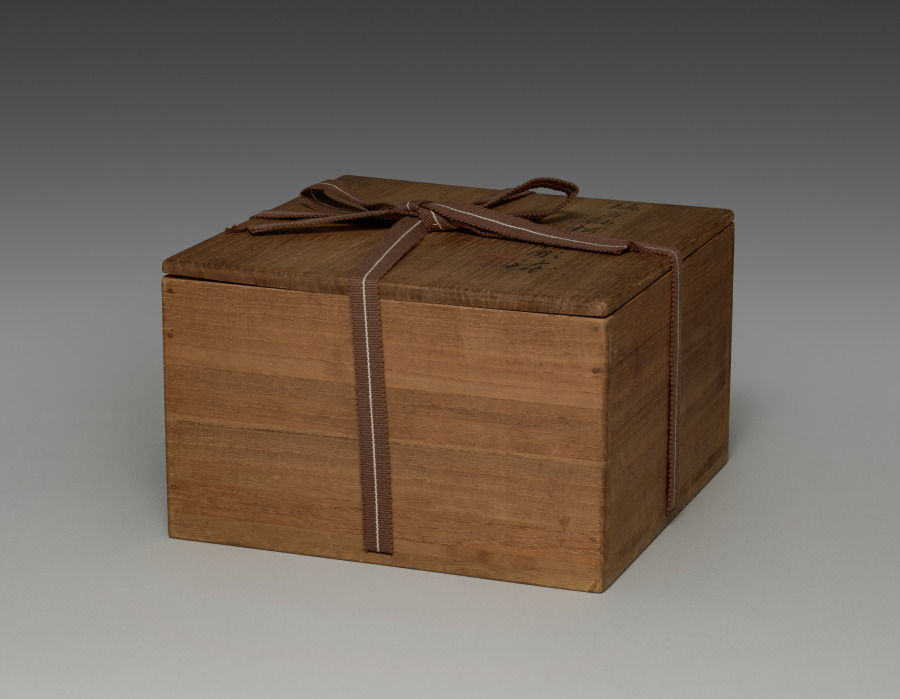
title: Bowl with Old Pine and Poem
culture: Japan, Taishō period (1912–26) or Shōwa period (1926–89)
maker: Seifū Yohei IV (Japanese, 1872–1951)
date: 1914–46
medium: Porcelain with molded and carved design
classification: Ceramic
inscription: 鶴樹君子風拂太平枝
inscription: 清風造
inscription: 清風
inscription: 成山清風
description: A grand, aged pine is carved into the body of this bowl. The inscription on the reverse side explains the tree’s presence. It is an altered version of two lines from a poem by Li Jiao (646?–715?) called “Pine.” Li Jiao was a senior government official who had a tumultuous career under the reign of Wu Zetian (r. 690–705), as well as those of her sons and grandson during the Tang dynasty (618–907). Although little known today, his work was read in Japan during the Heian (794–1185) and Kamakura periods (1185–1333). An anthology containing his poems, which was lost in China, was passed down across the generations in Japan. The translation of the inscription is as follows (the original characters, written and read from right to left, are shown below from left to right): The crane nests in the mastwood tree, the wind flicks at its peaceful branches. 鶴樹君子風拂太平枝 The mastwood is a pine-like evergreen, and the crane sheltering there is protected from the wind. In the original poem, the characters before “branches” (枝) are rather 大夫, meaning “high official.” This is likely a reference to the title bestowed upon a pine tree by the emperor Qin Shi Huang (r. 221–210 BCE) in thanks for its protection when a fierce rain fell as he ascended Mount Tai to pay his obeisance to the heavens.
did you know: The box inscription identifies the bowl's glaze as kanpakuyū, "bright-jewel white glaze."